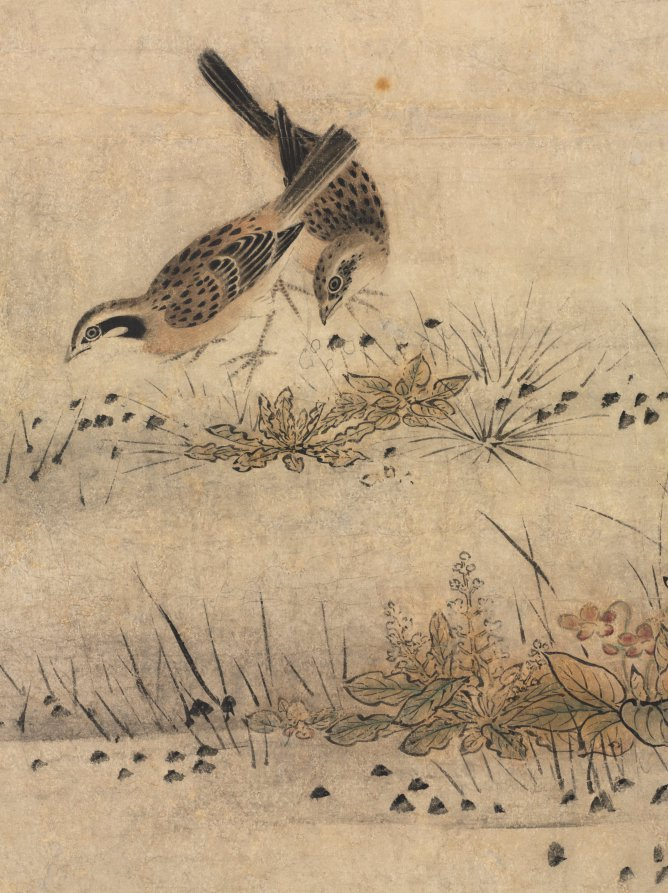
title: Flowers and Birds in a Spring Landscape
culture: Japan, Muromachi period (1392–1573)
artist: attributed to Kano Motonobu (Japanese, c. 1476–1559)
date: 1500s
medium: One of a set of sliding door panels mounted as hanging scrolls; ink and color on paper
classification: Painting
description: These four paintings originally decorated sliding doors that partitioned the interiors of Japanese buildings. Painters from the Kano school, named after the artist Kano Motonobu (1476–1559), were major forces in the production of screens and architectural interiors in Kyoto. When he headed the workshop, his work was prized by the upper strata of society. Kano is credited with combining the subtlety of Chinese black ink painting, as seen in the rocks and hills, with the color and realism of Japanese painting, seen in the birds and flowers. Landscape scenes like this were prized by the elite of Kyoto, both for their contemplative aesthetic and their patrons’ refined taste.